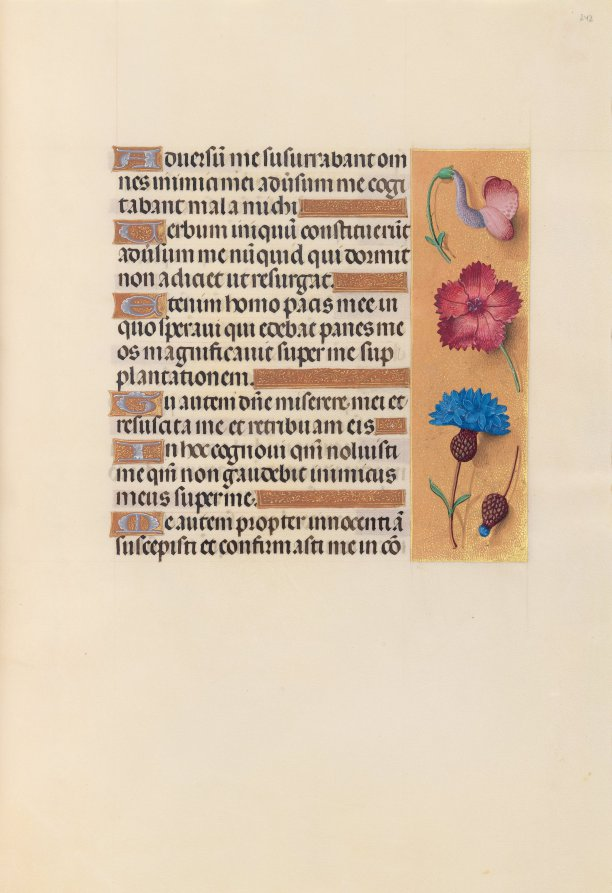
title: Hours of Queen Isabella the Catholic, Queen of Spain: Fol. 242r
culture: Flanders, Ghent and Bruges, late 15th century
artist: Master of the First Prayerbook of Maximillian (Flemish, c. 1444–1519)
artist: and Associates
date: c. 1500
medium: ink, tempera, and gold on vellum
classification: Bound Volume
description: This manuscript was illuminated by a circle of at least five highly organized manuscript painters active in the Flemish cities of Ghent and Bruges. The principal illuminator was Alexander Bening, who painted the majority of the book's miniatures. Manuscripts produced by this circle of artists are renowned for the decoration of their borders, which typically feature a rich variety of realistically-painted flowers, birds, and butterflies. This prayer book, called a book of hours, was intended not for a cleric, but for the private devotions of a lay person-in this case, Isabella the Catholic, Queen of Spain (1451-1504). Isabella's coat of arms embellishes the book's frontispiece. It is unlikely that the book was commissioned by the Queen herself; rather, she probably received it as a diplomatic gift from someone courting her patronage, perhaps Cardinal Francisco Jimenez de Cisneros. A Franciscan friar, Jimenez was dependent upon Isabella for his advancement, first to the post of Queen's confessor in 1492, and then to Archbishop of Toledo in 1495.